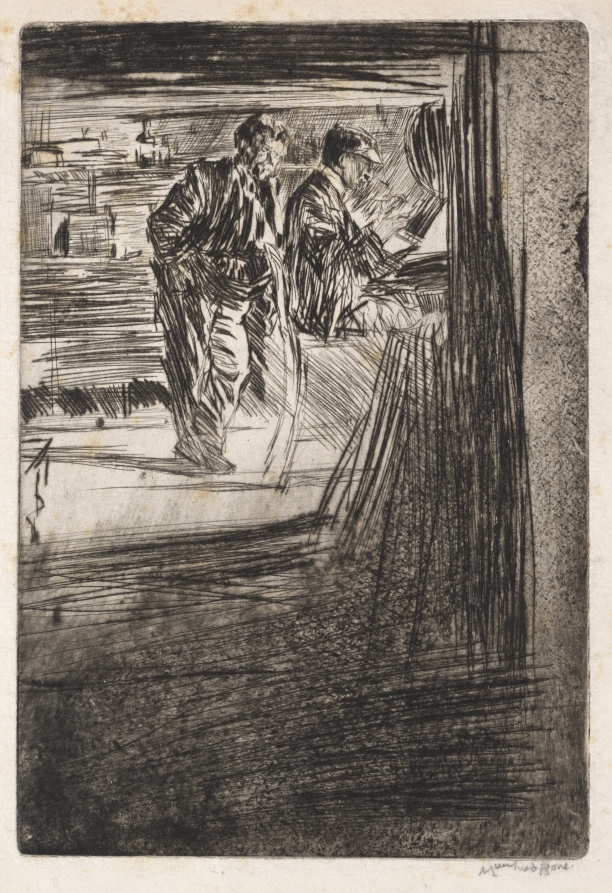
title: In Camera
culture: England, early 20th Century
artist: Muirhead Bone (British, 1876–1953)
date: 1901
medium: drypoint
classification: Print